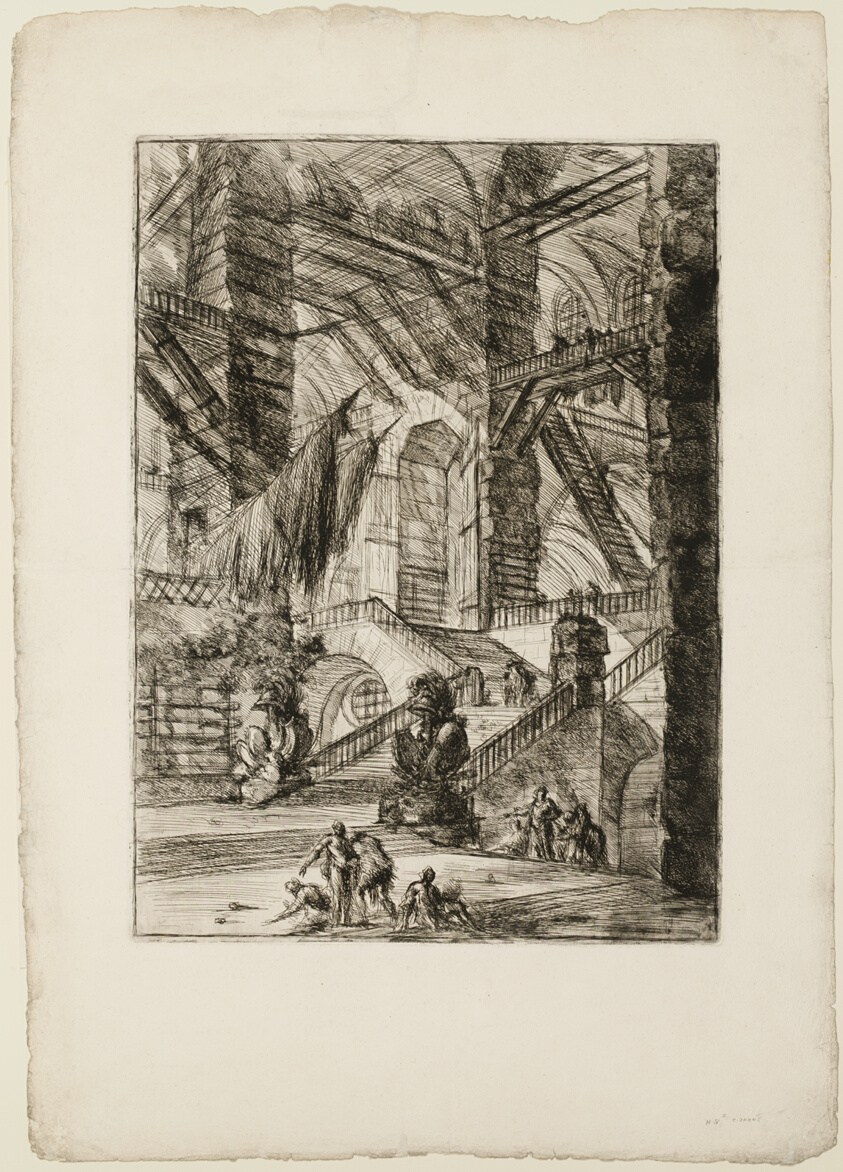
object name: Print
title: The Staircase with Trophies, plate 8 from Imaginary Prisons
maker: Giovanni Battista Piranesi (Italian, 1720-1778)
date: c. 1750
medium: Etching and engraving on heavy ivory laid paper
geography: Italy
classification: etching; print; prints and drawing